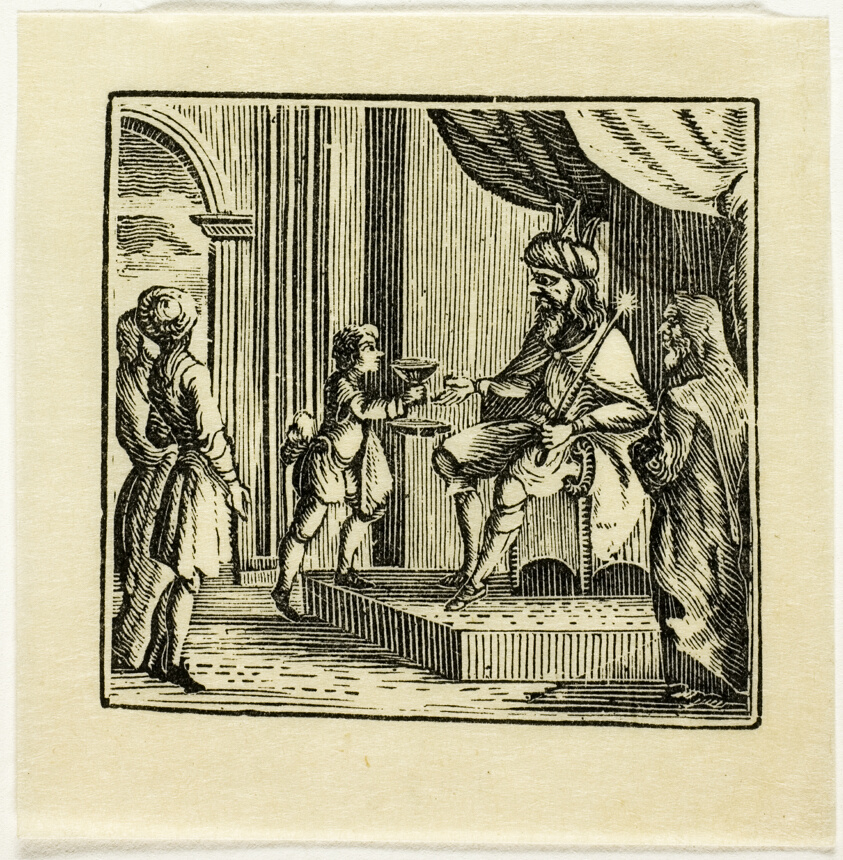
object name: Print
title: Book Illustration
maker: Thomas Bewick (English, 1753-1828)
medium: Wood engraving on paper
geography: England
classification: wood engraving; print; prints and drawing